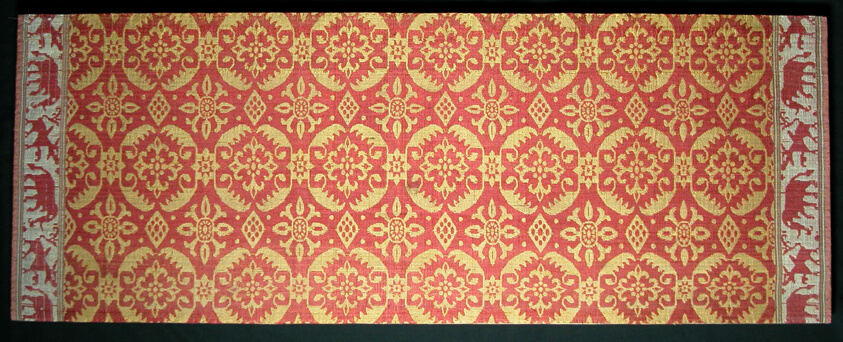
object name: Textile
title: Panel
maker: North-Eastern India (modern Indian state of Assam)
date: 18th century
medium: Silk, double cloth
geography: India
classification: textile; weaving